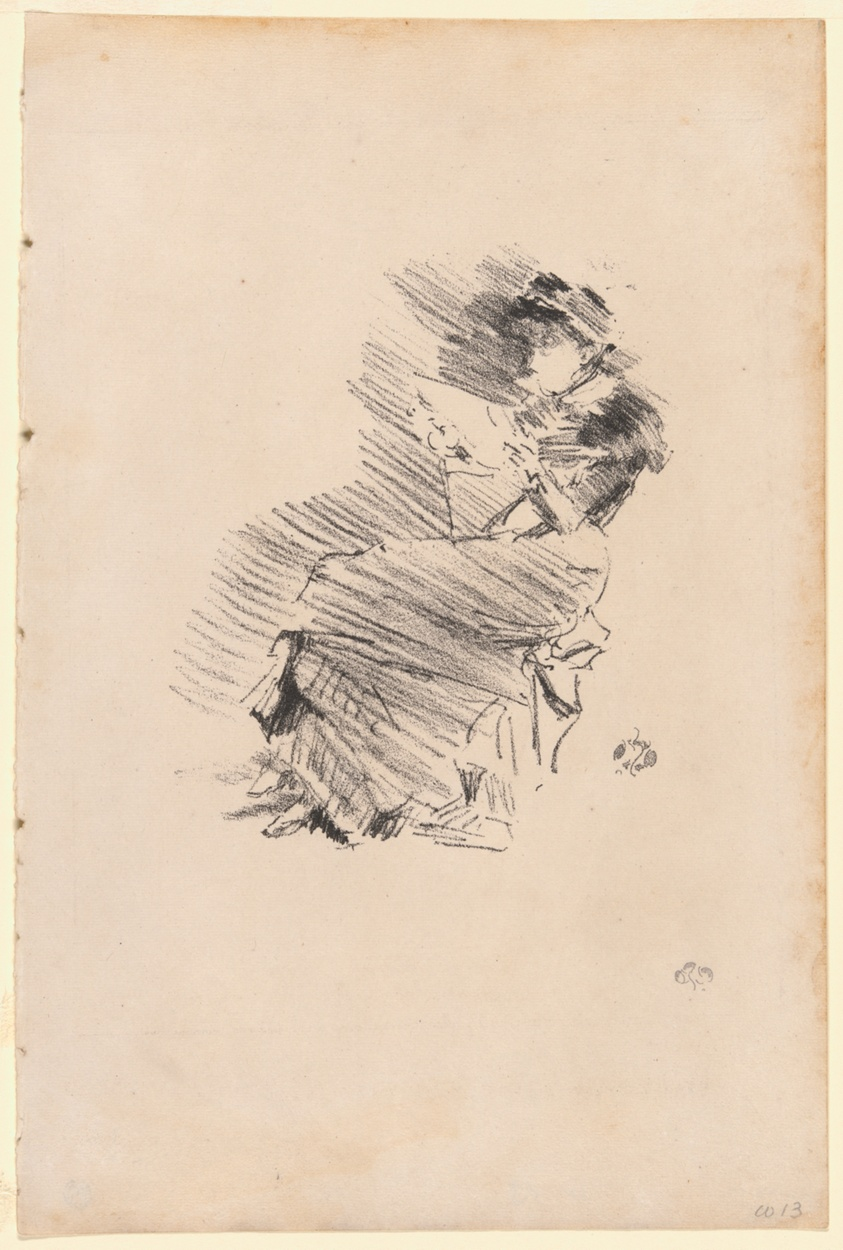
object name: Print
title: Reading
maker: James McNeill Whistler (American, 1834-1903)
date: 1879, published 1887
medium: Lithograph, in black ink, with scraping, on cream laid paper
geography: United States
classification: lithograph; print; prints and drawing; paper